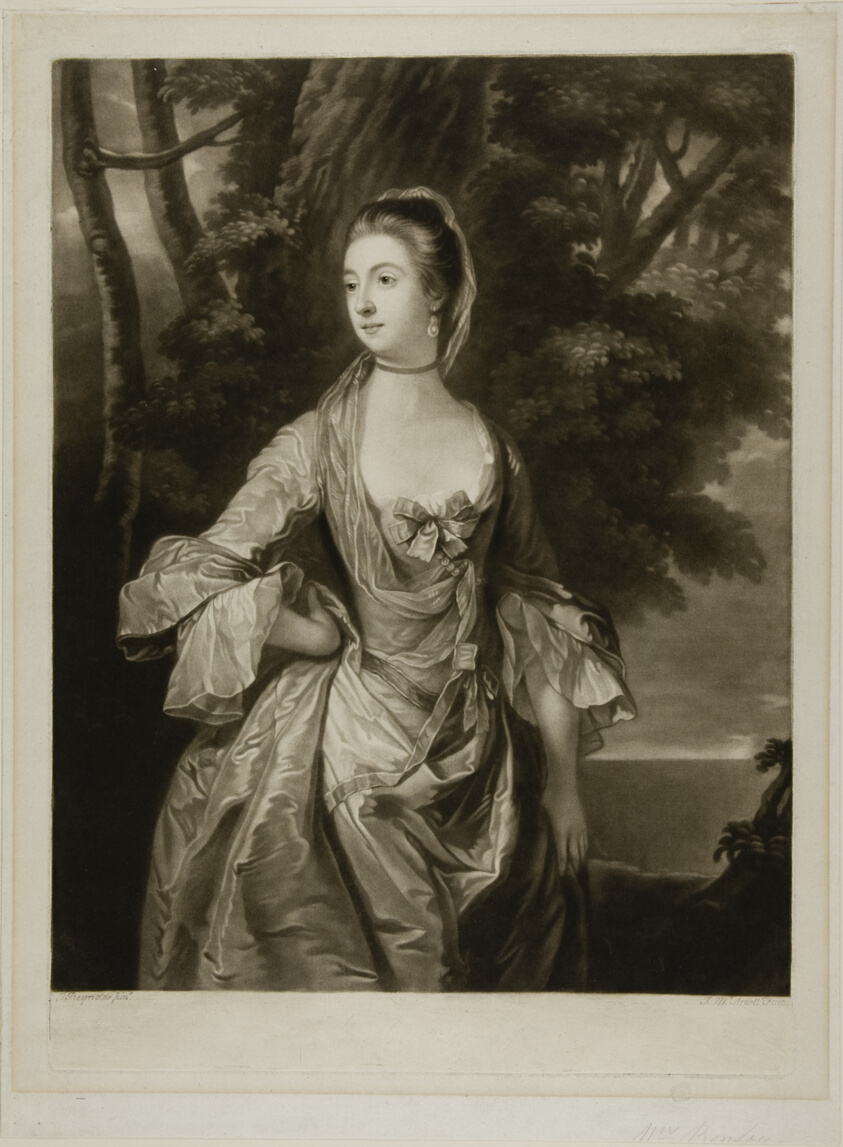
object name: Print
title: Mrs. Bonfoy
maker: James McArdell (Irish, c. 1728-1765); after Sir Joshua Reynolds (English, 1723-1792)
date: c. 1754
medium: Mezzotint on paper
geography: Ireland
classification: mezzotint; print; prints and drawing